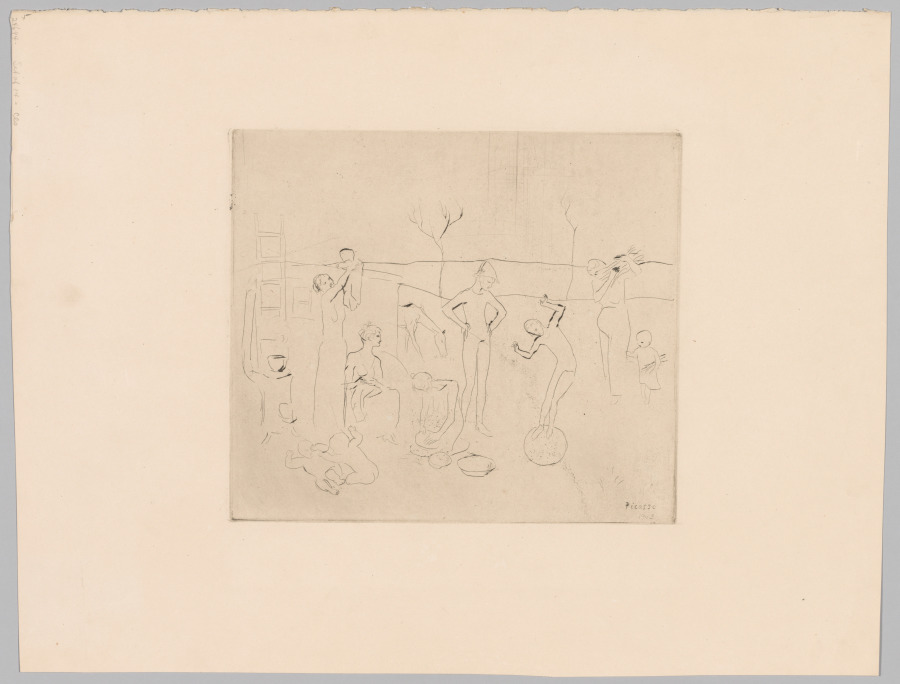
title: The Saltimbanques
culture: Spain, 20th century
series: The Saltimbanques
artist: Pablo Picasso (Spanish, 1881–1973)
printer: Louis Fort (French, active 1800s–1900s)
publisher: Ambroise Vollard (French, 1867–1939)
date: 1905, printed 1913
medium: drypoint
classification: Print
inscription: Signed, lower right, in plate: Picasso / 1905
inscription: Watermark: VAN GELDER ZONEN